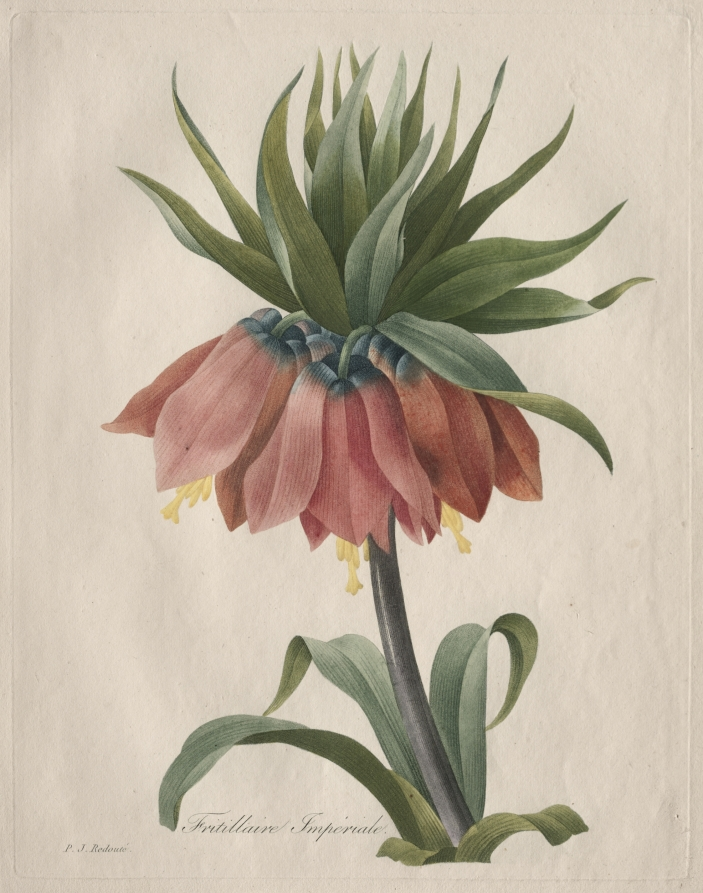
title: Crown Imperial Fritillary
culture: France, 19th century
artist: Henri Joseph Redouté (French, 1766–1853)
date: 1827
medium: stipple, roulette and line engraving with hand coloring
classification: Print